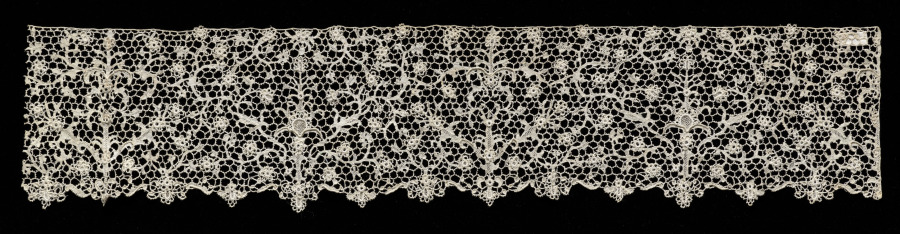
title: Lace Edging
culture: France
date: 1900–1935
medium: Linen: needle lace (Point de France)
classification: Lace